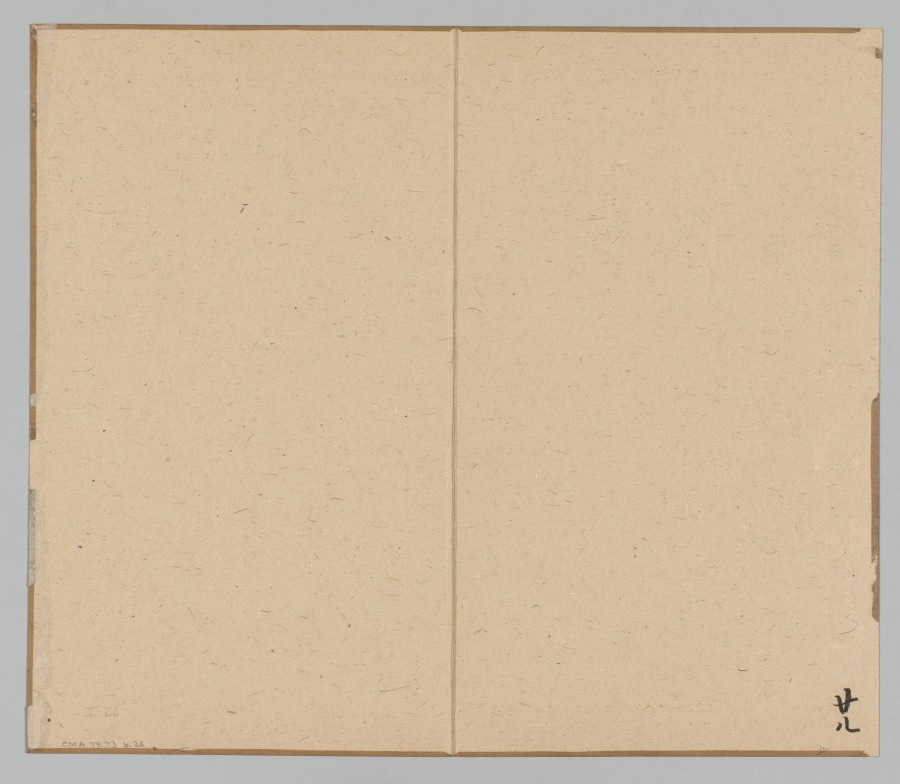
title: Reverberations of Taiga, Volume 2 (leaf 26)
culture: Japan, Edo period (1615–1868)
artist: Aoki Shukuya (Japanese, d. 1802)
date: mid- to late 1700s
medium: double-leaf from a pair of albums; ink and light color on paper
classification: Portfolio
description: Traditionally, young painters in Japan began their studies with an established master-painter. The master's compositions invariably became models that the apprentice copied to learn various ink and brush techniques. Shukuya was a pupil of the famous Kyoto artist Ikeno Taiga, whose style is reflected in these sketches of rocks, trees, and mountains.